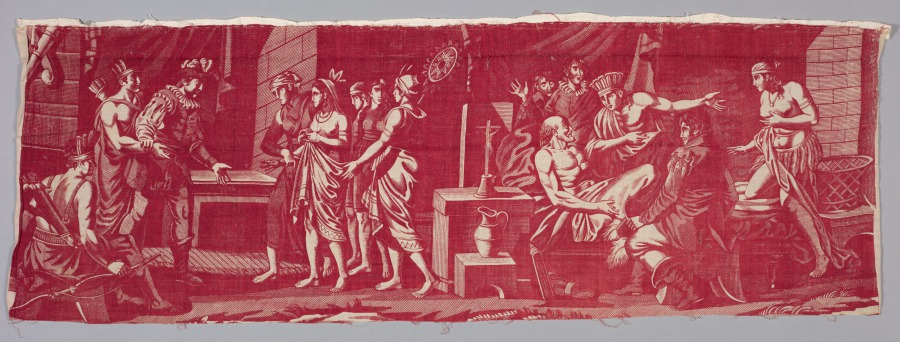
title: Copperplate Printed Textile Fragment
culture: Spain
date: 1700s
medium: copperplate printed cotton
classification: Textile